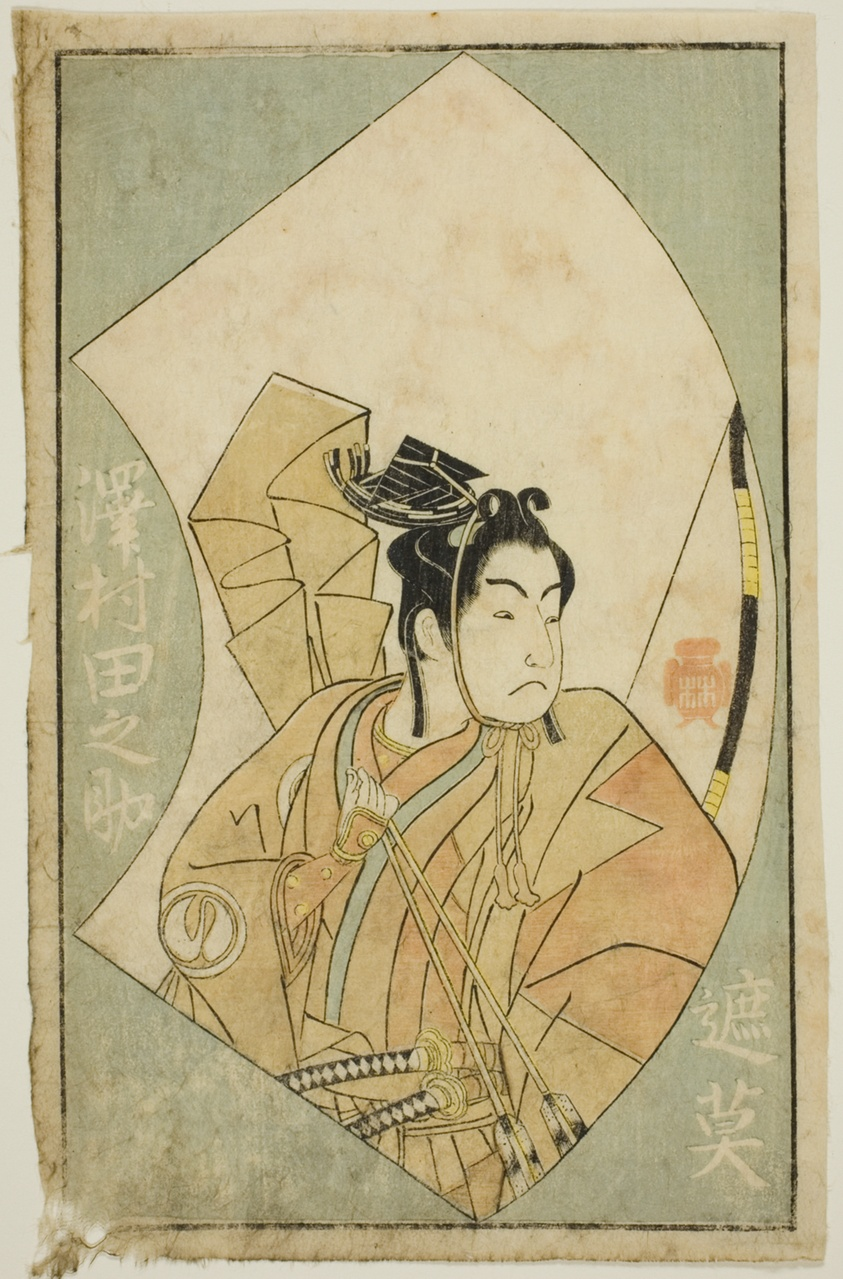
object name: Print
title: The Actor Sawamura Tanosuke I, from "A Picture Book of Stage Fans (Ehon butai ogi)"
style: Japanese (culture or style)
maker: Katsukawa Shunsho 勝川 春章; Japanese, 1726-1792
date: 1770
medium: Color woodblock print; page from illustrated book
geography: Japan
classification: woodblock print; print; asian art